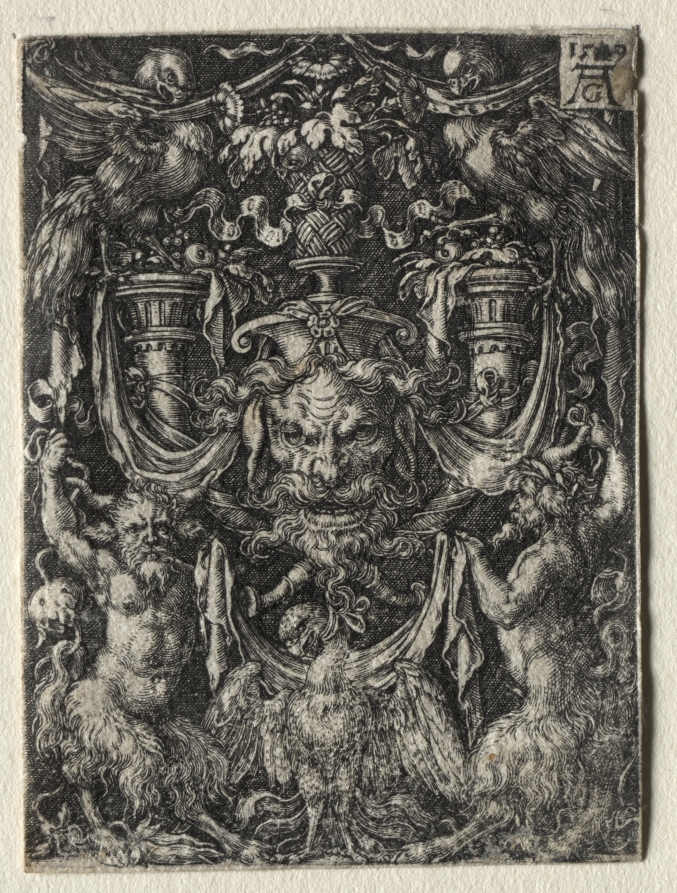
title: Ornament Design with a Mask and an Eagle between Two Fauns Below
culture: Germany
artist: Heinrich Aldegrever (German, 1502–1555/61)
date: 1509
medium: engraving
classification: Print